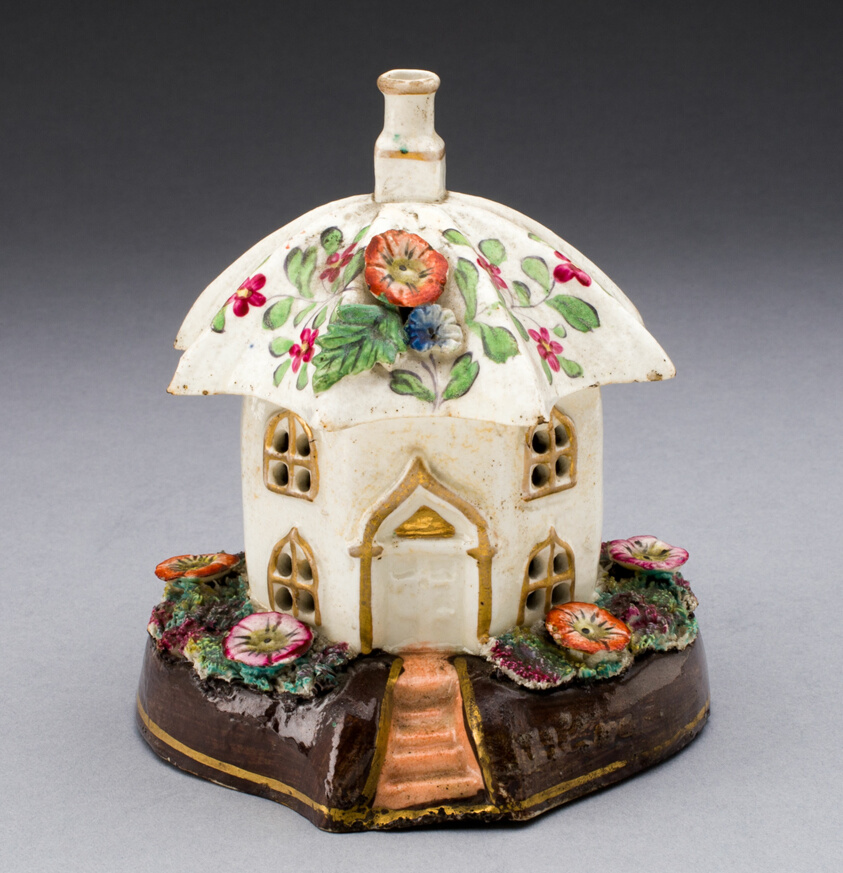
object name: Ceramics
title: Incense Burner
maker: England, Staffordshire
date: c. 1830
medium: Glazed earthenware with polychrome enamel decoration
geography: Staffordshire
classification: ceramics; european decorative arts